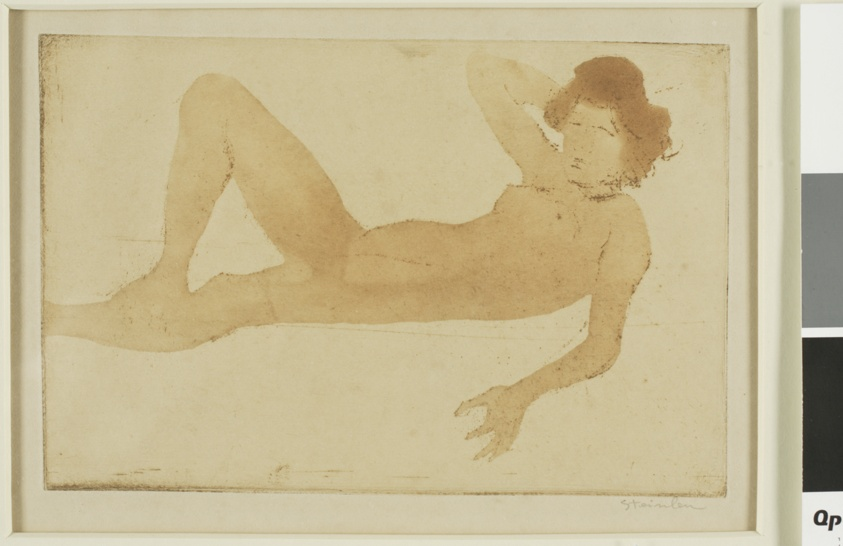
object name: Print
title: Reclining Nude Woman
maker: Théophile-Alexandre Steinlen (French, born Switzerland, 1859-1923); published by Sagot, Paris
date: 1902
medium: Aquatint with soft ground etching, in orange-brown and brown, from a zinc plate, on paper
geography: France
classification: aquatint; print; prints and drawing